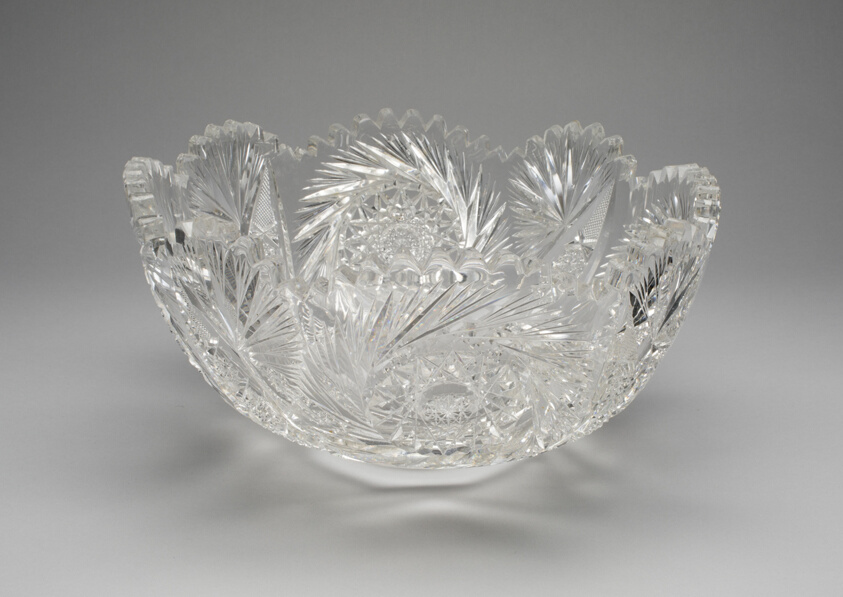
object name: Glass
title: Punch bowl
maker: Artist unknown (American, 19th–20th century)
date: 1880–1900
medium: Glass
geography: United States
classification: punch bowl; glass; american decorative arts; american arts; decorative arts